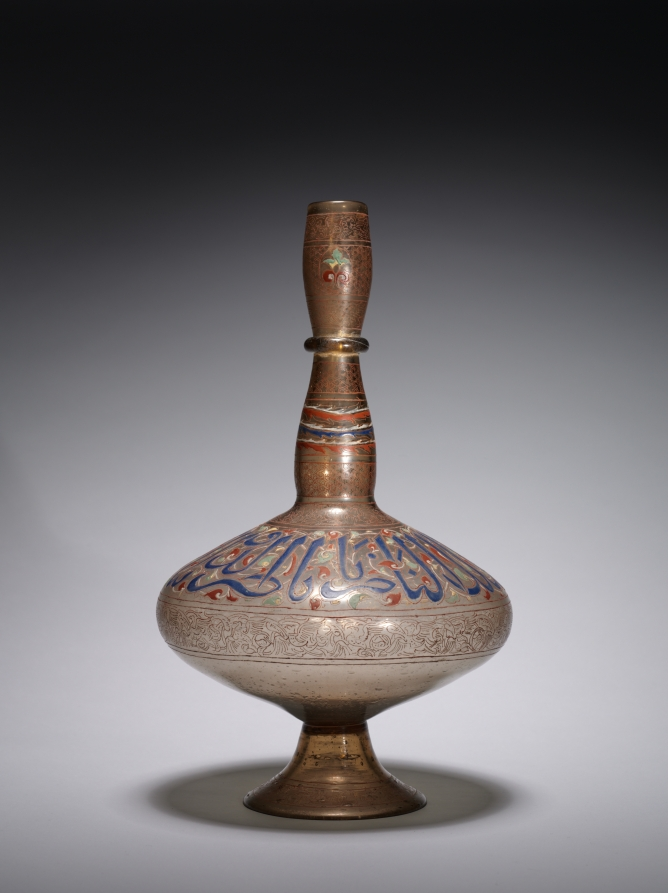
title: Bottle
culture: Europe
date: c. 1900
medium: glass with enameled and gilded decoration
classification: Glass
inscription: The inscription translates: "Glory to our lord, the sultan, the king, the victorious, the protector of the world and the religion, Muhammed."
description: The bold inscription on the body of the bottle translates: “Glory to our lord, the sultan, the king, the victorious, the protector of the world and the religion, Muhammad.” The sultan referred to here is the Mamluk ruler Muhammad ibn Qala’un (1285–1341), who is also referenced on the nearby mosque lamp. This bottle, as with the mosque lamp CMA 1981.10, is representative of reproductions of Mamluk glass that were prominent in the late 1800s in Europe during a period of resurgence of interest in Islamic art. At this time, collectors and artists revived the techniques of enameling and gilding that are hallmarks of Mamluk glass.